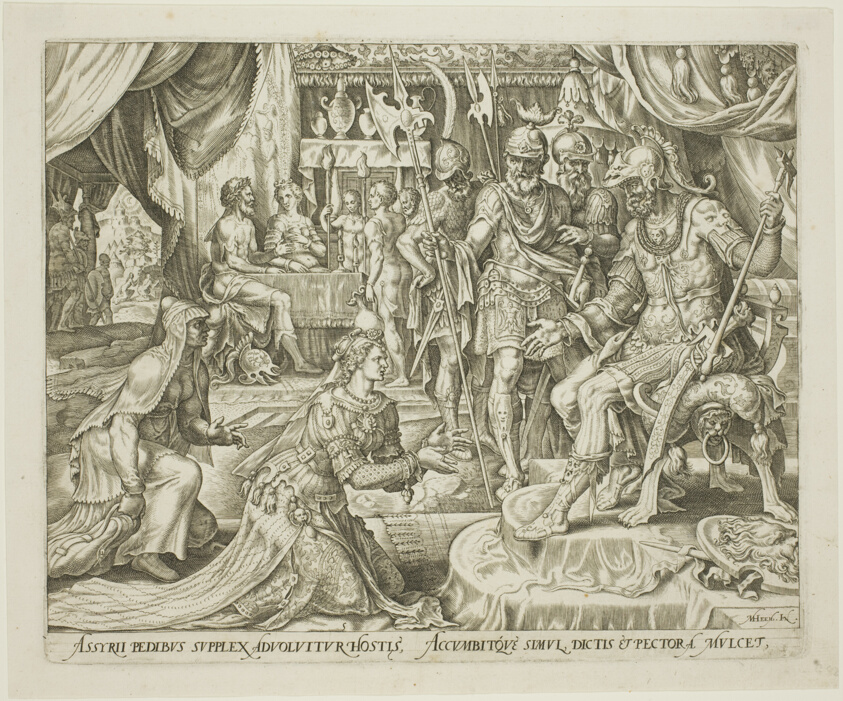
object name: Print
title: Judith Presented to Holofernes, plate five from The Story of Judith and Holofernes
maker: Philip Galle (Netherlandish, 1537-1612); after Maarten van Heemskerck (Dutch, 1498-1574)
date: 1564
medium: Engraving in black on ivory laid paper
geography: Netherlands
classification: engraving; paper; print; prints and drawing